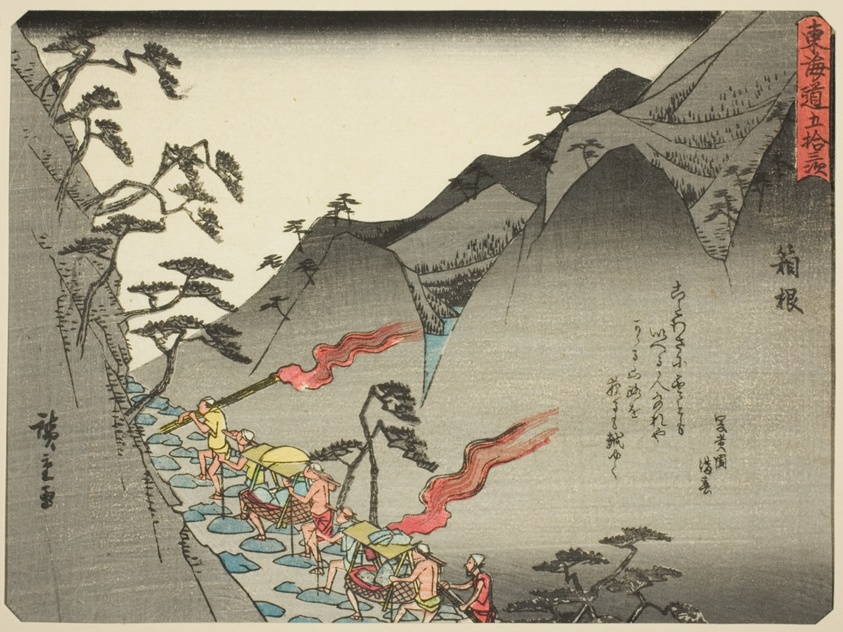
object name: Print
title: Hakone, from the series "Fifty-three Stations of the Tokaido (Tokaido gojusan tsugi)," also known as the Tokaido with Poem (Kyoka iri Tokaido)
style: Japanese (culture or style)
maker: Utagawa Hiroshige 歌川 広重; Japanese, 1797-1858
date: c. 1837/42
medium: Color woodblock print; chuban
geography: Japan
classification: woodblock print; print; asian art